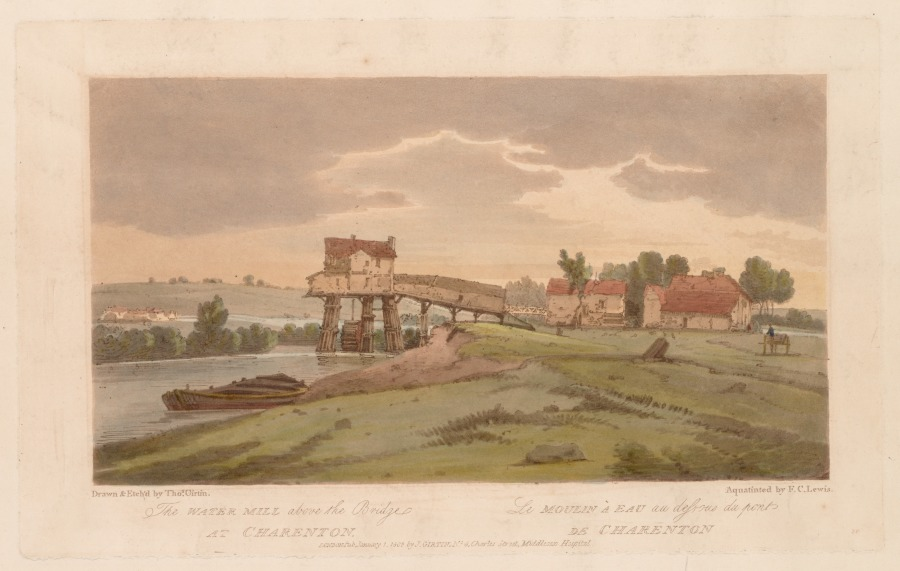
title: A Selection of Twenty of the Most Picturesque Views in Paris: The Water Mill above the Bridge at Charenton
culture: England, 19th century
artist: Thomas Girtin (British, 1775–1802)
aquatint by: Frederick Christian Lewis (British, 1779–1856)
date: 1803, printed 1810 or after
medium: softground etching and aquatint printed in brown, hand-colored with watercolor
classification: Print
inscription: In plate; Drawn & Etch'd by Thos Girtin; Aquatinted by F. C. Lewis; LONDON: Pubd January 1 1803 by Thos & John Girtin, No. I, Little Newport Street, Gerrard Street, Soho.